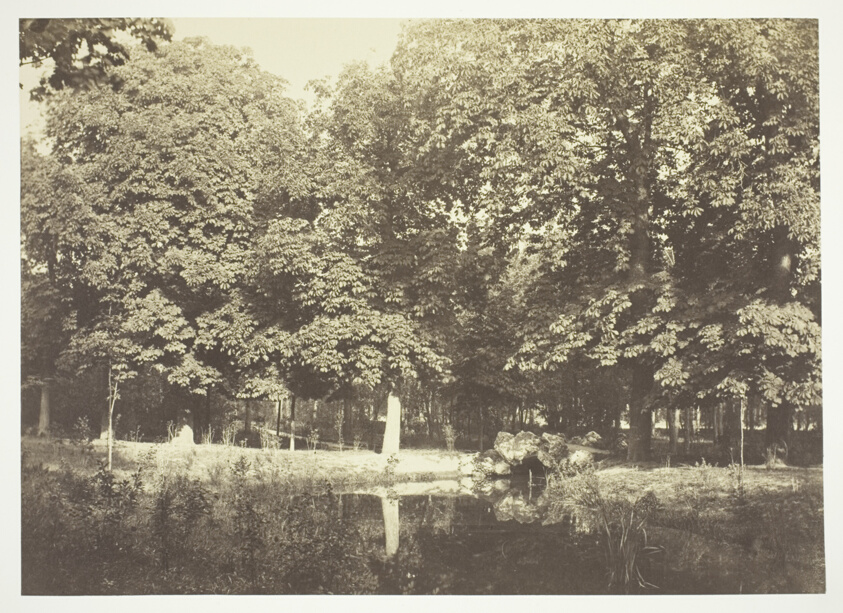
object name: Photograph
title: Untitledprint, from the series "Bois de Boulogne"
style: 19th century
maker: Charles Marville (French, 1813–1879)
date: c. 1850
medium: Albumen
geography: France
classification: albumen silver print; photographic process; photography; photograph